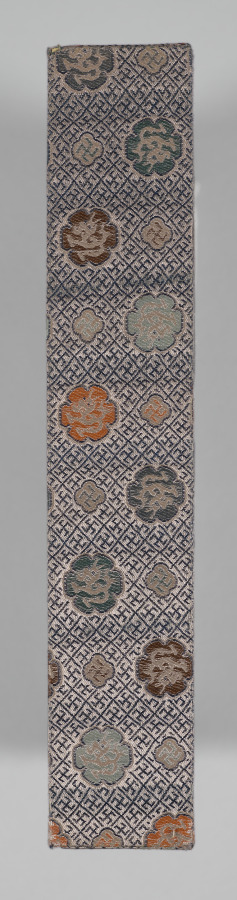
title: Yu-hai (Ocean of Jade) woodblock bound volume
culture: China, Ming dynasty (1368–1644)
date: 1368–1644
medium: woodblock-printed book with painted edges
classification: Bound Volume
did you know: When each book is rolled to form a cylinder, a landscape appears on the edges, painted in ink and washes of color.